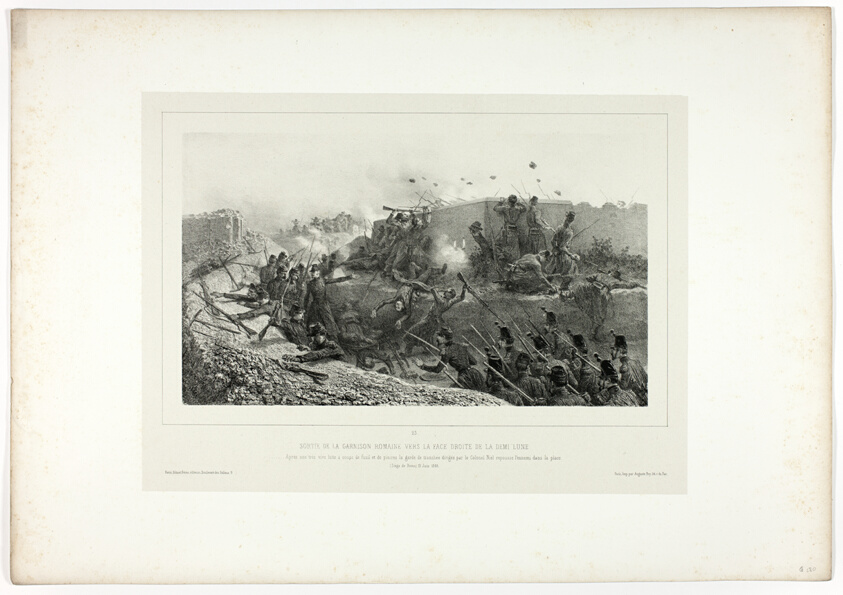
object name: Print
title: Sortie of the Roman garrison..., from Souvenirs d’Italie: Expédition de Rome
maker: Denis Auguste Marie Raffet (French, 1804-1860); printed by Auguste Bry (French, 19th century); published by Chez Gihaut Frères (French, 19th century)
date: 1854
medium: Lithograph in black on warm ivory wove chine laid down on off-white wove paper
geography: France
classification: lithograph; print; prints and drawing